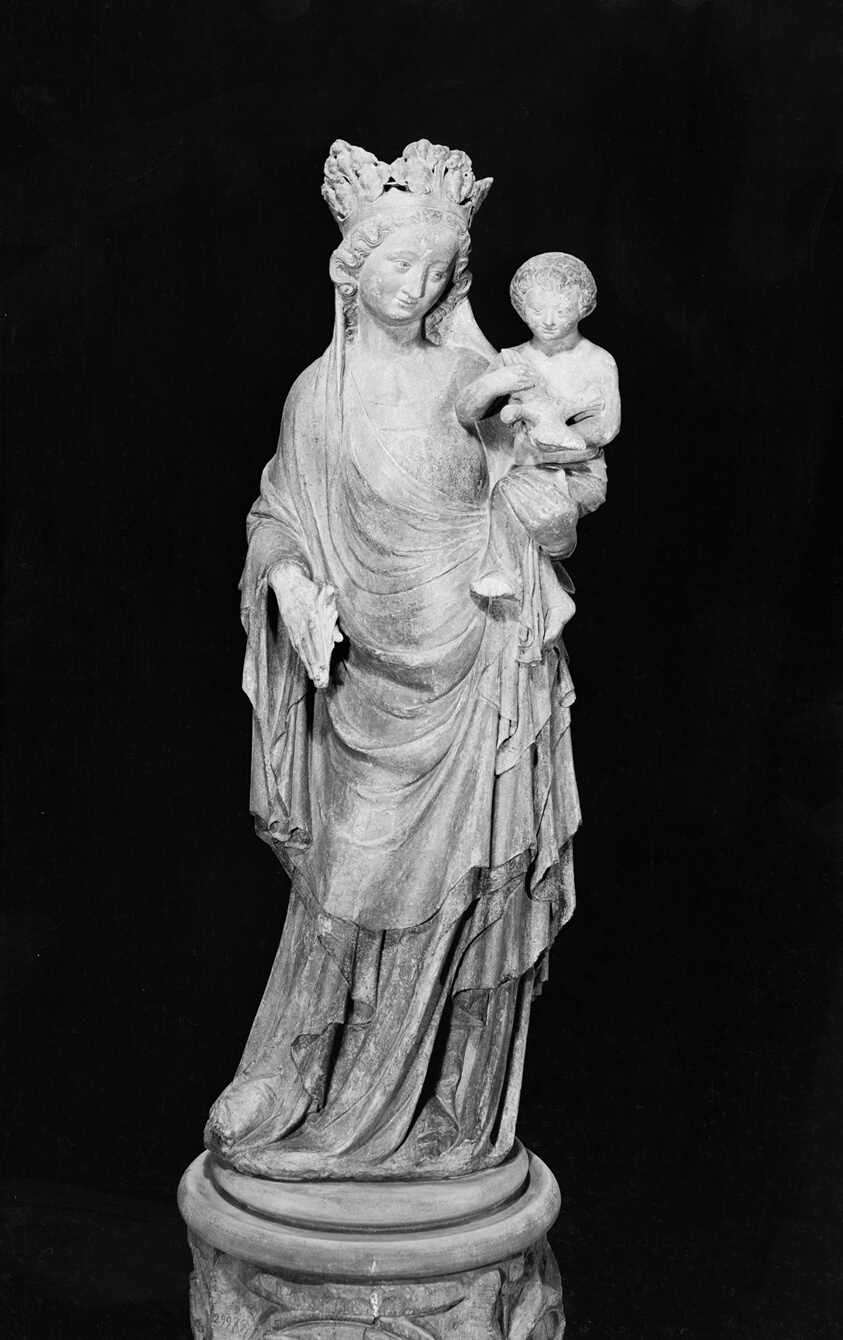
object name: Sculpture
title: Virgin and Child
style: 14th century, medieval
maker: French, Île-de-France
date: 1350-75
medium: Limestone with traces of paint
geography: France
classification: large scale; sculpture; limestone; stone; sculpture/stone; french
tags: Virgin and child/Madonna and child, child, children, Christian subjects, Christianity, Jesus, mother, mother and child, religion, religious, religious figures, sons, Virgin Mary